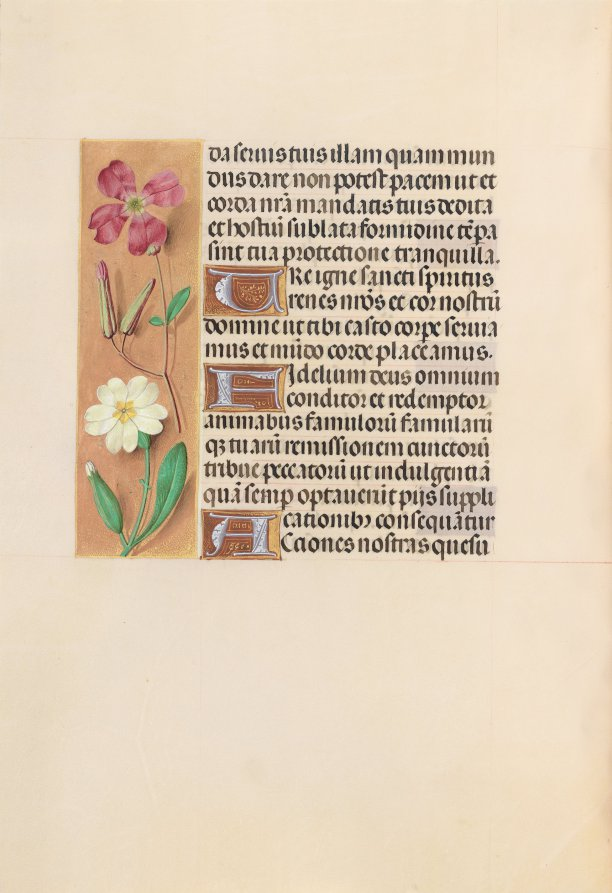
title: Hours of Queen Isabella the Catholic, Queen of Spain: Fol. 217v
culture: Flanders, Ghent and Bruges, late 15th century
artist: Master of the First Prayerbook of Maximillian (Flemish, c. 1444–1519)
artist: and Associates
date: c. 1500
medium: ink, tempera, and gold on vellum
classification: Bound Volume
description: This manuscript was illuminated by a circle of at least five highly organized manuscript painters active in the Flemish cities of Ghent and Bruges. The principal illuminator was Alexander Bening, who painted the majority of the book's miniatures. Manuscripts produced by this circle of artists are renowned for the decoration of their borders, which typically feature a rich variety of realistically-painted flowers, birds, and butterflies. This prayer book, called a book of hours, was intended not for a cleric, but for the private devotions of a lay person-in this case, Isabella the Catholic, Queen of Spain (1451-1504). Isabella's coat of arms embellishes the book's frontispiece. It is unlikely that the book was commissioned by the Queen herself; rather, she probably received it as a diplomatic gift from someone courting her patronage, perhaps Cardinal Francisco Jimenez de Cisneros. A Franciscan friar, Jimenez was dependent upon Isabella for his advancement, first to the post of Queen's confessor in 1492, and then to Archbishop of Toledo in 1495.